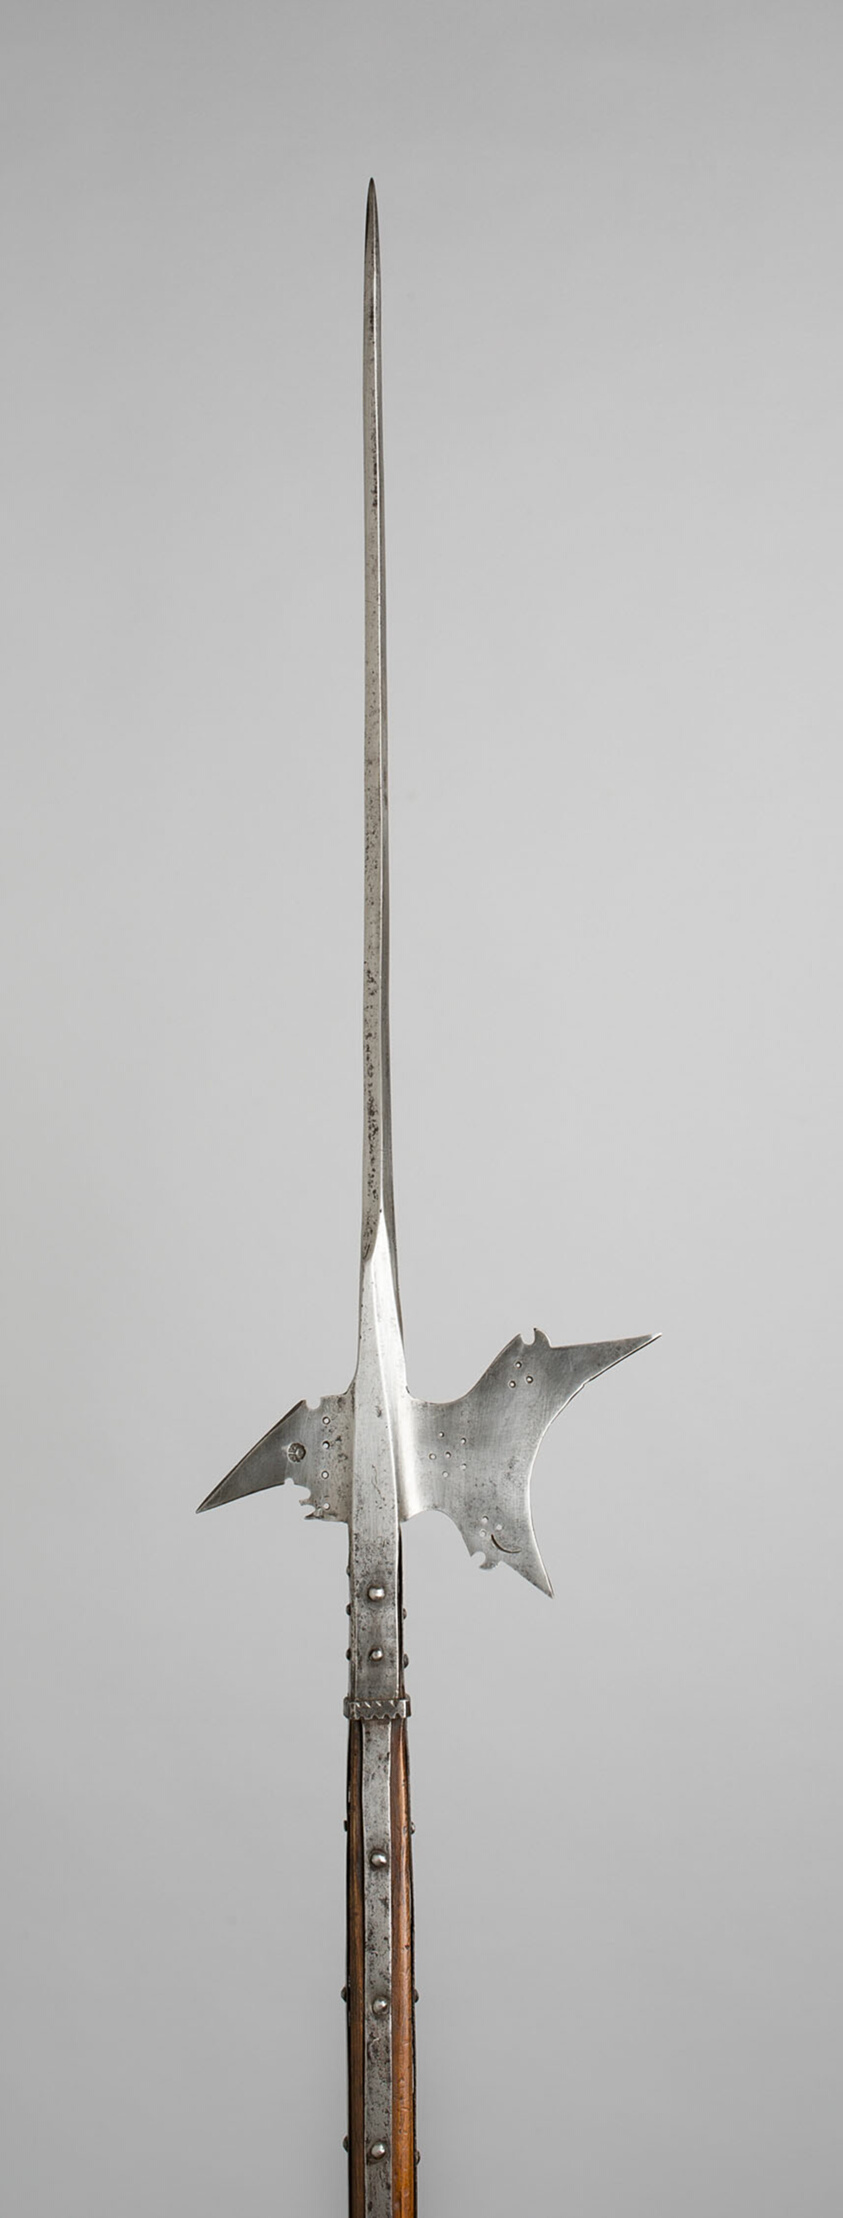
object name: Arms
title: Halberd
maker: German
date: 1575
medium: Steel, wood (ash), and iron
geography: Germany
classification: edged weapon-staff; arms; arms and armor